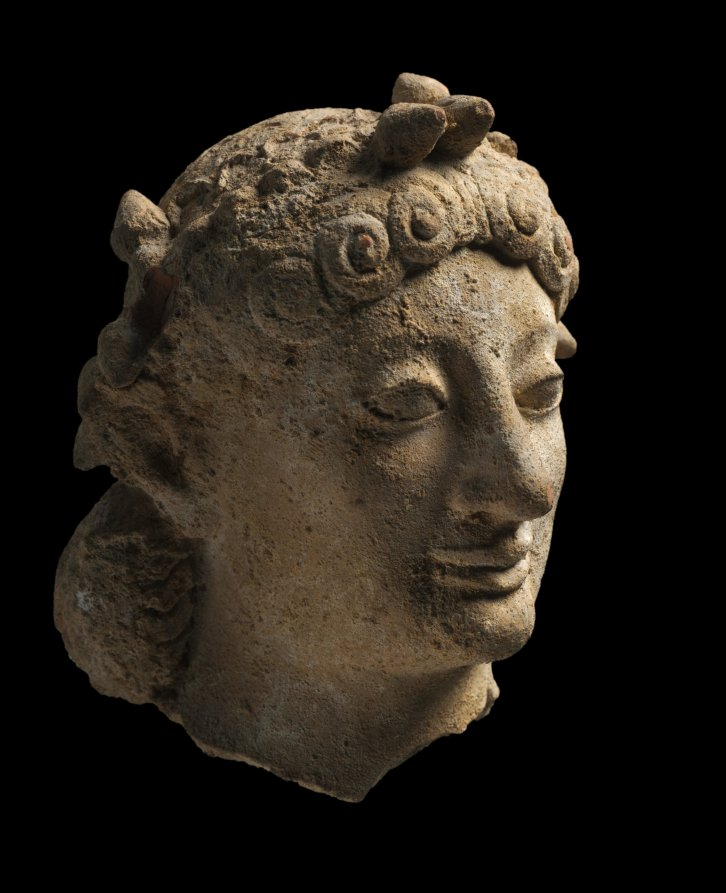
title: Head of Artemis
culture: Greece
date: 600–575 BCE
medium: terracotta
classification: Sculpture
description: Artemis was the goddess of hunting. Her long straight nose, almond-shaped eyes, and "archaic smile" are very similar to those of Atalanta on the contemporary white-ground lekythos (1966.114)